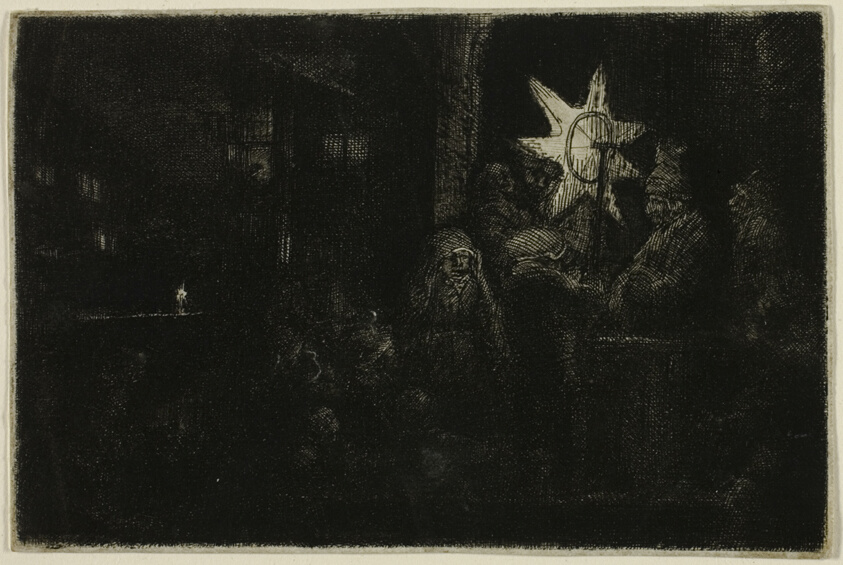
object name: Print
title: The Star of the Kings: A Night Piece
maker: Rembrandt van Rijn (Dutch, 1606-1669)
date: c. 1651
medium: Etching, drypoint, and engraving on ivory laid paper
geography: Holland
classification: print; etching; prints and drawing; paper; drypoint; engraving